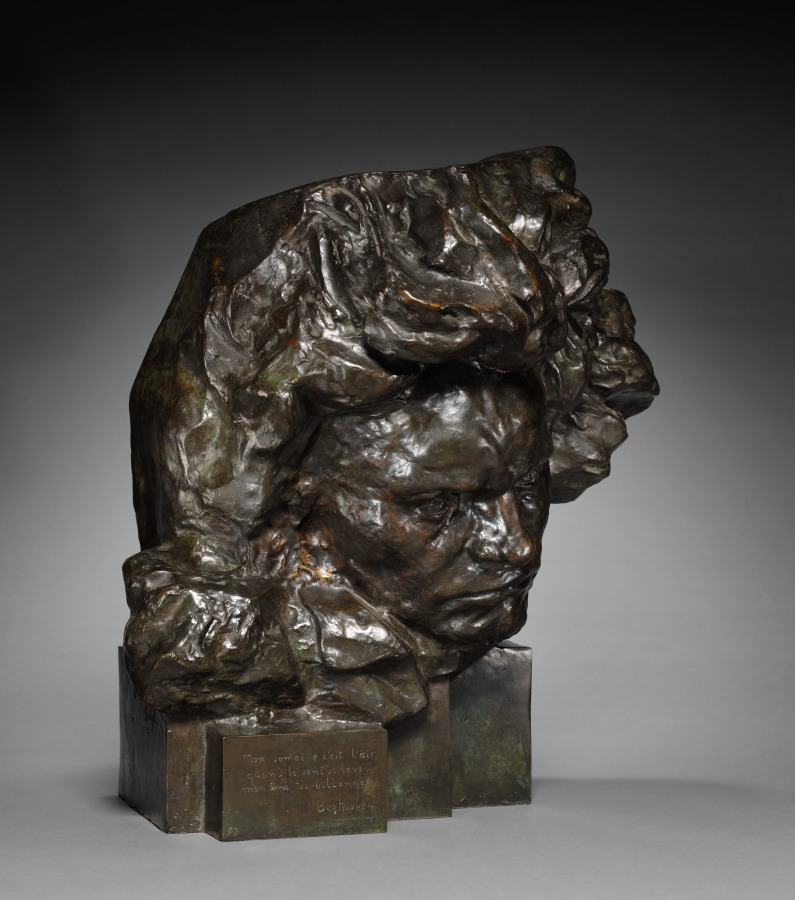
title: Head of Beethoven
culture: France, 19th century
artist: Emile Antoine Bourdelle (French, 1861–1929)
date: 1891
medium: bronze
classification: Sculpture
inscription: Signed left side: "Bourdelle / Sculpt."; inscribed right side: "FONRIENATLE DES BRONZES / J PETERMANN: ST GILLES BRUXELLES"; inscribed on front: "Mon domaine c'est l'air / quand le vent, se leve / mon âme tourbillonne / Beethoven"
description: A pioneer of modern sculpture, Antoine Bourdelle studied at the École des Beaux-Arts in Paris and worked as an assistant to Augustin Rodin, who greatly admired the younger artist’s work. In 1888 Bourdelle produced the first of a series of sculptural portraits of Ludwig van Beethoven, in which the artist orchestrated powerful billowing shapes to convey the creative spirit or genius of the composer. The artist inscribed a quote from Beethoven in the lower left: “My domain is the air; when the wind rises my soul swirls.”